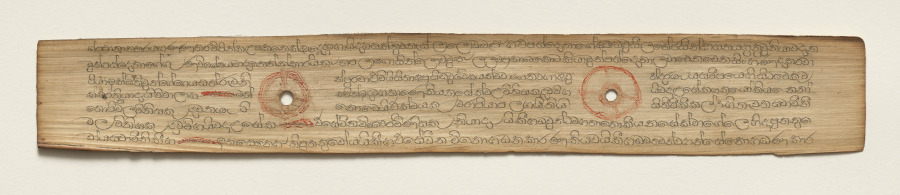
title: Leaf from a Buddhist Manuscript (verso)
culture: Sri Lanka, Singhalese, Late 17th century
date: c. 1700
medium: fiber paper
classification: Manuscript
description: Palm leaf material is still used for manuscripts in Sri Lanka. The palm leaves are prepared first by boiling them, drying them in the sun, and then rubbing them with oils. Scribes then use a metal stylus to incise the text. Then charcoal powder is wiped across the pages, filling in only the inscribed lines.